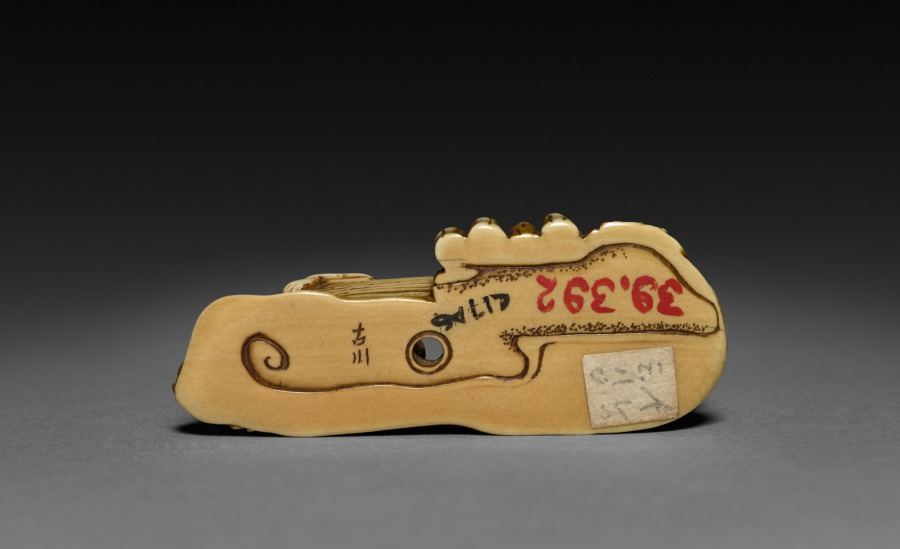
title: Three Figures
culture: Japan, Meiji period (1868–1912)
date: early 1900s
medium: ivory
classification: Ivory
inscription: 古川